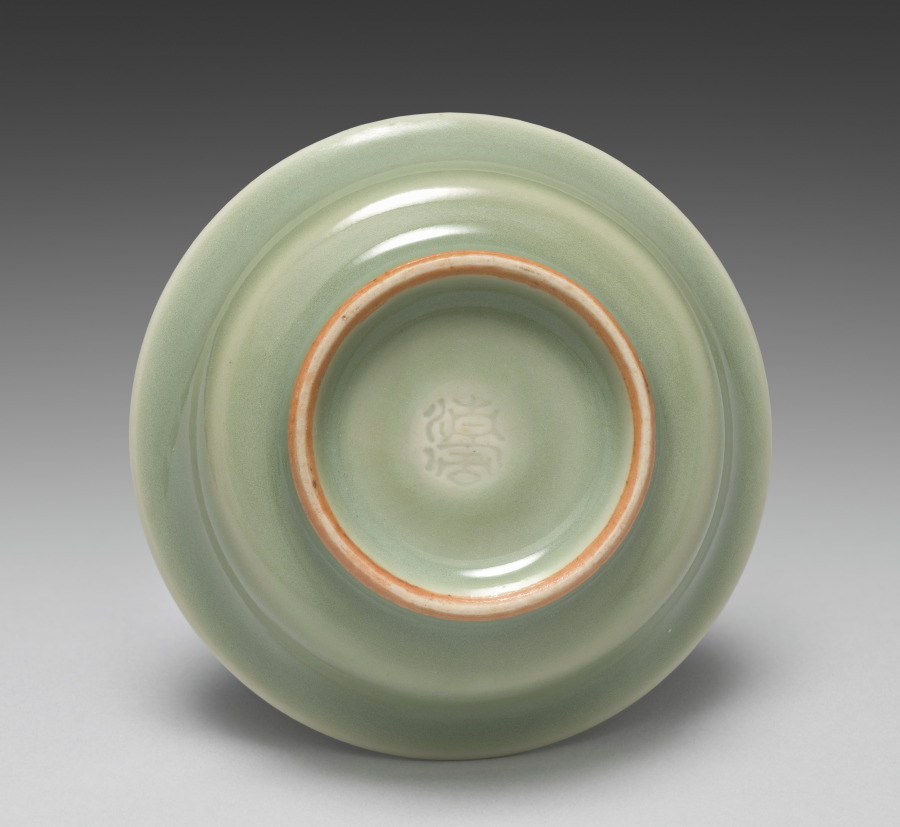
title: Saucer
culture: Japan, Meiji period (1868–1912)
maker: Seifū Yohei III (Japanese, 1851–1914)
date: 1893–1914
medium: One from a set of ten dishes; porcelain with green glaze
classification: Ceramic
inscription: 清風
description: Yohei III’s main output for his sophisticated clientele was in the form of tea sets and dining sets. He created a range of dishes in green glazes. He often produced in pairs, sets of five, or sets of ten. For this set of ten small dishes in a simple, round form that emphasizes the glaze above all, the box lid designates the piece as seiji, or green-glazed porcelain, using a general term for the extensive palette of green glazes often called celadon in English. The box lid further identifies the dishes themselves as tōchō, literally “bean-sized saucers,” a size that makes them suitable for dipping sauces.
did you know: The ten dishes in this set are stored in stacks of five in a two-compartment box.